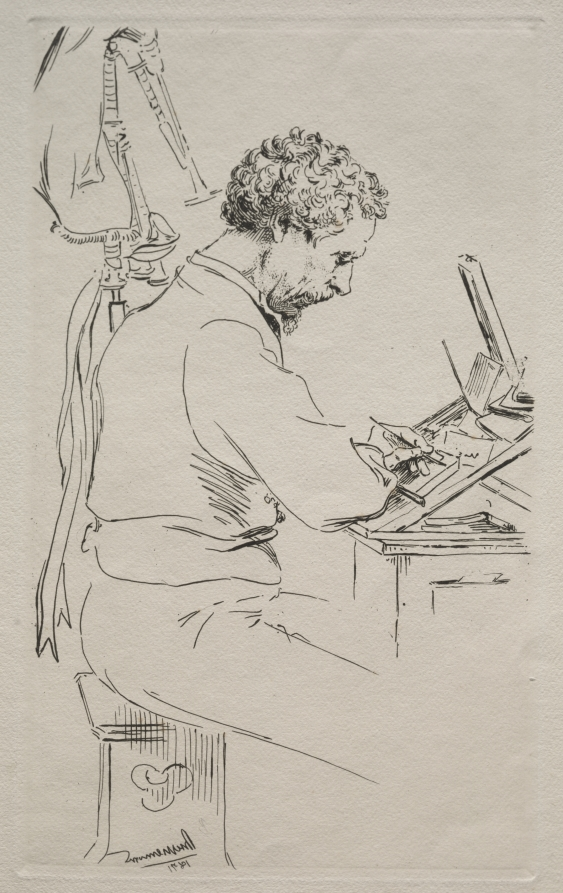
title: Charles Kean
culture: France, 19th century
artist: Félix Bracquemond (French, 1833–1914)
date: 1871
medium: etching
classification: Print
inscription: signed and dated, lower left, in plate: Bracquemond 1871